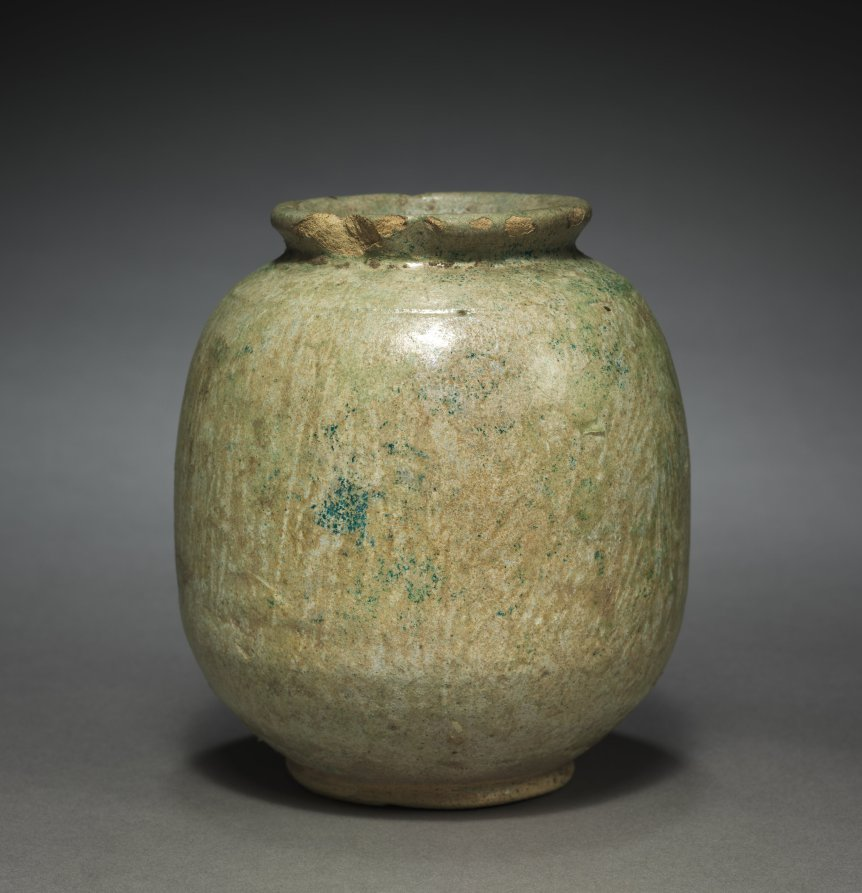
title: Ovoid Vase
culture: Parthian Empire (247 BCE–224 CE)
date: 1–200 CE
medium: terracotta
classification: Ceramic